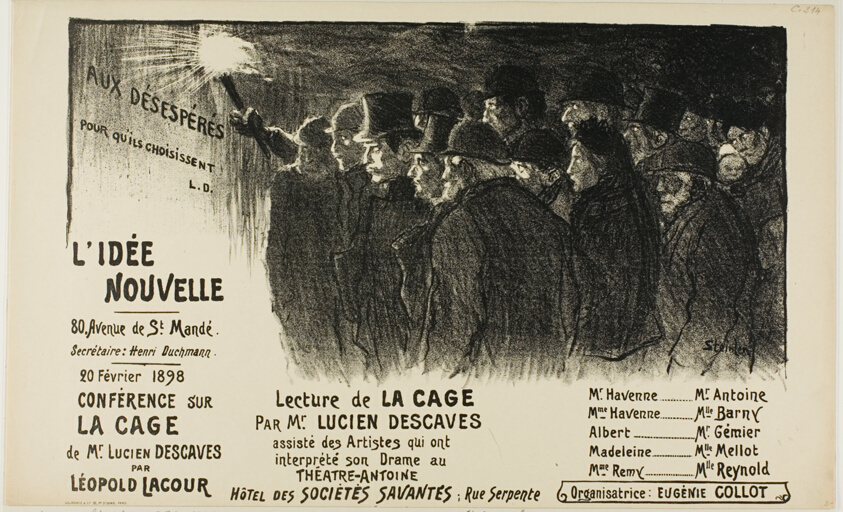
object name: Print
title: L'Idée Nouvelle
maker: Théophile-Alexandre Steinlen; French, born Switzerland, 1859-1923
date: February 1898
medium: Lithograph in black on cream wove paper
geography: France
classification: lithograph; print; prints and drawing